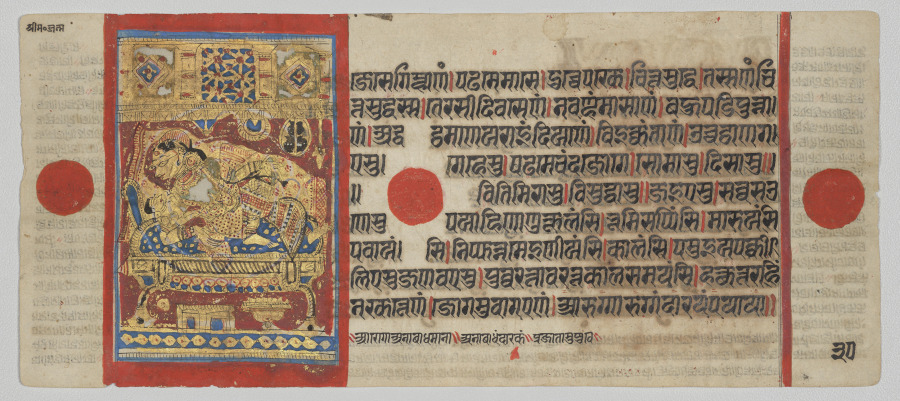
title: Birth of Mahavira, folio 30 (verso), from a Kalpa-sutra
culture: Western India, Gujarat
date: c. 1475–1500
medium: Gum tempera, ink, and gold on paper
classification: Painting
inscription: [[upper left]] Śrī Ma* janma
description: Accounts of the lives of liberated beings of the Jain religion are illuminated with special emphasis on the miraculous circumstances leading to the birth of its historical founder Mahavira (500s BCE). For Jains, liberated beings are not reborn after they die; they exist eternally in a blissful meditative state. After a divinity miraculously implanted the embryo of Mahavira into the womb of Queen Trishala, she dreamed of 14 good omens. Later in the manuscript is an intimate moment between the mother and her special newborn. The bold and costly palette lends the paintings an otherworldly quality.